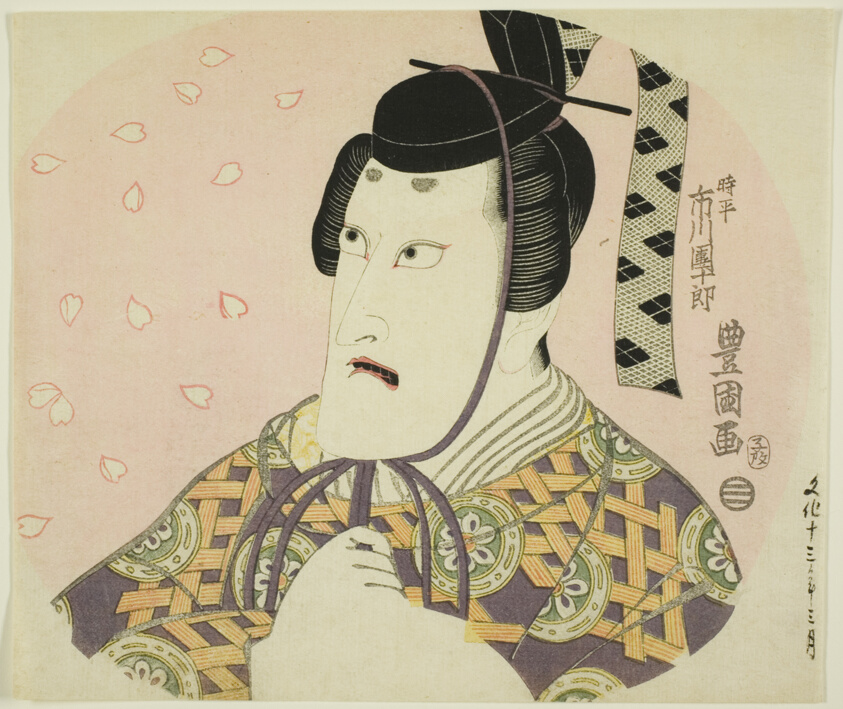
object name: Print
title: Ichikawa Danjuro VII as Fujiwara no Shihei (Tokihira, Minister of the Left), in Ume Sakura Aioi-zoshi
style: Japanese (culture or style), edo (japanese period), Japanism, East Asian, asian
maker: Utagawa Toyokuni I 初代 歌川 豊国; Japanese, 1769–1825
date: c. 1816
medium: Color woodblock print; uchiwa-e (fan print)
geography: Japan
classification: woodblock print; print; asian art